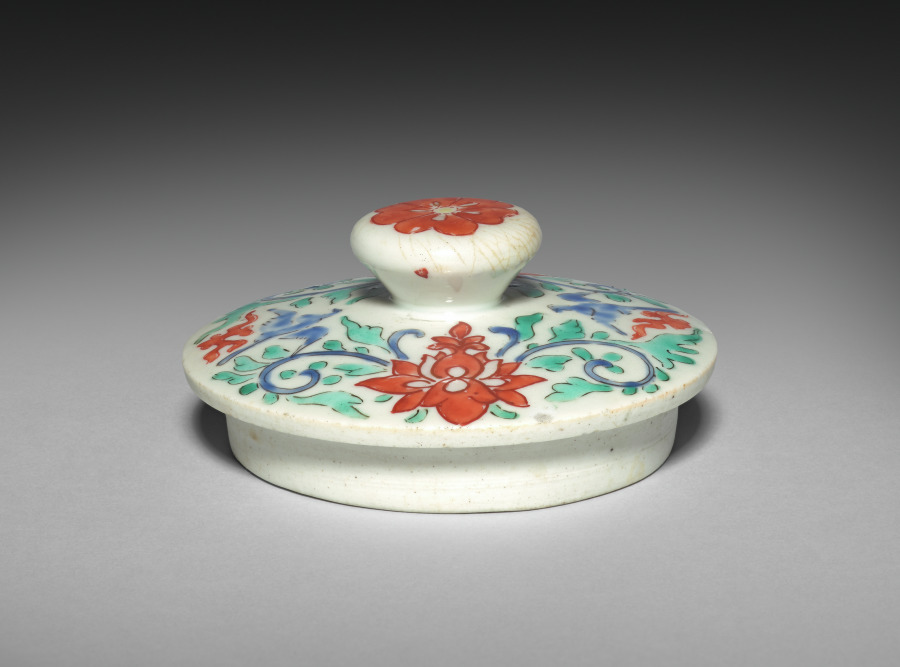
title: Square Jar with Birds and Flowers (lid)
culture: Japan, Edo period (1615–1868)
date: late 1600s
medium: Porcelain with overglaze color enamels and gold (Hizen ware, Kakiemon type)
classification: Ceramic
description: This lidded square jar was likely paired with a complementary yet nonidentical mate. The pine tree, plum, and bamboo together form the frequently depicted motif known as the Three Friends of Winter (shōchikubai), so named because of their hardy perseverance in the cold. Each side also features a pair of birds, including cranes on one face and pheasants on another.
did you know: A jar like this was fired at a high temperature, painted with colored enamels, and then fired again at a lower temperature.